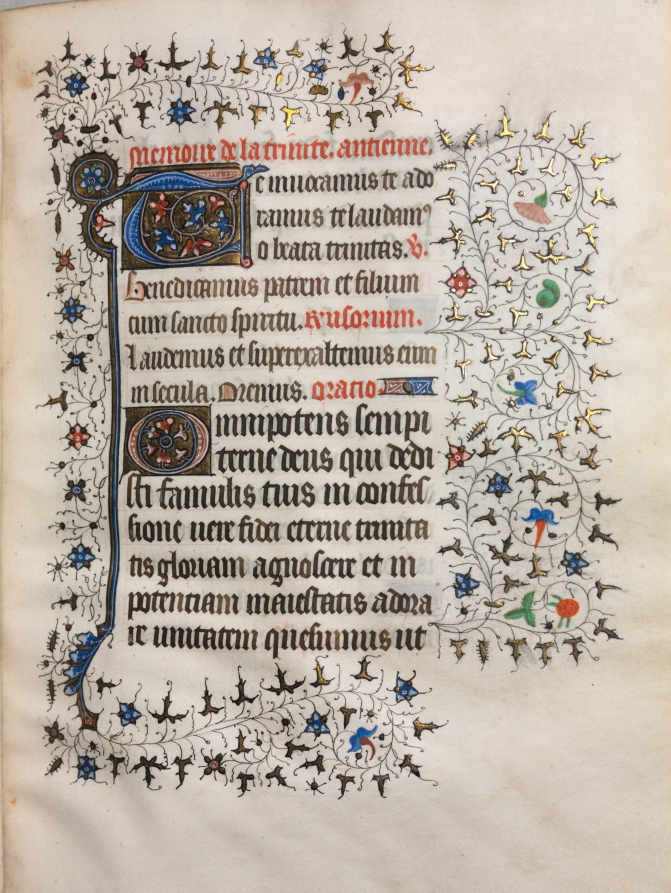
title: Book of Hours (Use of Paris): Decorated Initial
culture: France, Paris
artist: follower of Boucicaut Master (French, Paris, active about 1410–25)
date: c. 1420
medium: ink, tempera, and gold on vellum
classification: Bound Volume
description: The Guise Master-named after the book of hours he illustrated for François de Lorraine, Duke of Guise-developed his style from the more dominant Parisian workshop of the Boucicaut Master.